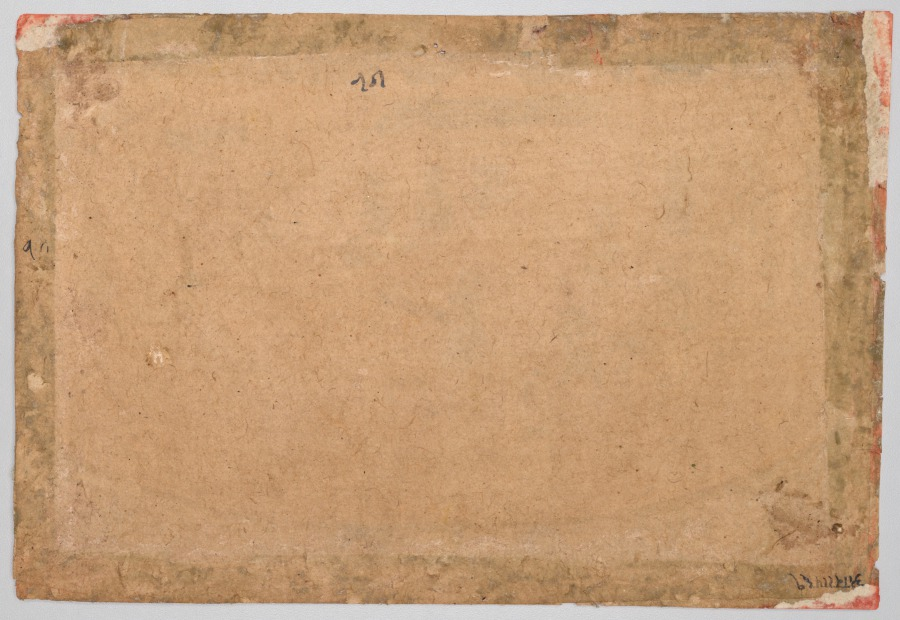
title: Shurpanakha demands vengeance, from the "Shangri" Ramayana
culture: Northern India, Pahari kingdoms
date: c. 1700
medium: Gum tempera, ink, and gold on paper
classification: Painting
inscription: [[verso, lower right corner, in Sanskrit, upside down]] aranya 31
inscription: [[recto, in the borders, indistinct Takri script]] Shurpanakhā (?)--- lankā āyī ---- rāvaṇe prati jhūth bachan boldī hoyi je tan raje bich matra (?) hoyī hai. Sri rām chandre khar dūsana sāra māre mera dheya(?) hoyā. Sri rām chandre de sath isdī ek istri ----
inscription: [[verso, top, in Takri script]] 71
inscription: [[verso, left side, in Takri script]] 71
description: In a dramatic climax, the artists introduce the demon king, Ravana (the Howler), archvillain of the Ramayana. He has 10 crowned heads and 20 arms. He grasps a different deadly weapon in each hand; they reveal his supreme powers. The demon Shurpanakha’s nose and ears are healing, but her desire for revenge is stronger than ever. She gestures emphatically at her brother Ravana, urging him to find a way to destroy Rama, perhaps by kidnapping Rama’s wife. More gold has been lavished on this painting than any other known from the “Shangri” Ramayana, suggesting that it is meant to stand out as a scene of primary importance.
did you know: The Ramayana of Valmiki describes Shurpanakha as hideous, misshapen, and potbellied with hair the color of copper.